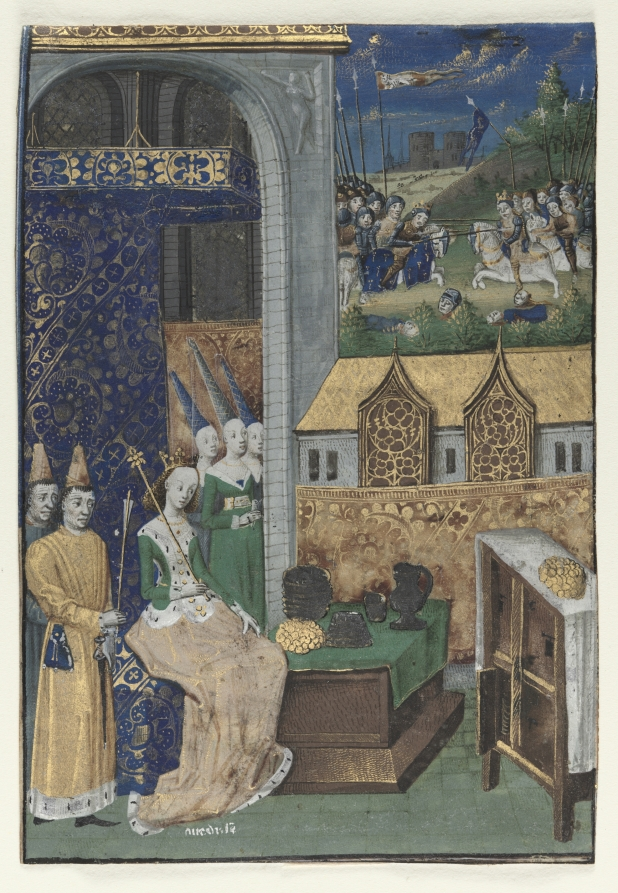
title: Single Miniature Excised from Boccaccio's Des Cleres et nobles femmes: Queen Medusa and Her Court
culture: France, 15th century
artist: circle of Maître François (French)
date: c. 1470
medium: tempera and gold on vellum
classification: Manuscript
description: This miniature comes from the French translation of a book by the Italian poet Giovanni Boccaccio (1313–1375). A compilation of biographies of famous women, Boccaccio’s work remained popular in France throughout the 1400s, especially with aristocratic bibliophiles, and was usually beautifully illustrated in the form of a deluxe manuscript. Shown here is the miniature introducing the chapter dealing with the legend of Queen Medusa. Surrounded by her courtiers, Medusa instructs the reader on the disadvantages of possessing wealth, which brings fear and superstition as well as loss of sleep, security, and peace of mind.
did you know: Medusa is shown here with her attendants before she was turned into the gorgon, a fierce frightening monster.